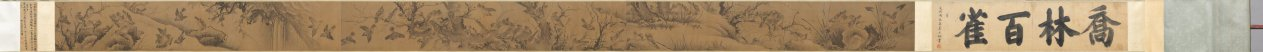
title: A Hundred Sparrows in a Lofty Grove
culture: China, Ming dynasty (1368–1644)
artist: attributed to Lin Liang (Chinese, 1416–1480)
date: 1368–1644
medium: handscroll; ink on silk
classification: Painting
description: Sparrows engaged in all kinds of activities frolic amid leafy branches, blades of grass, rocks, and a waterfall. As our eyes move over the scroll, the artist engages us in enjoying the sparrows’ carefree movements in a natural setting. The charming birds were painted from close observation in swift and fluent brushstrokes. Sparrows are a common bird and in Chinese painting they often represent the commoner in human society as opposed to the noble pheasant or peacock representative of the ruling class.